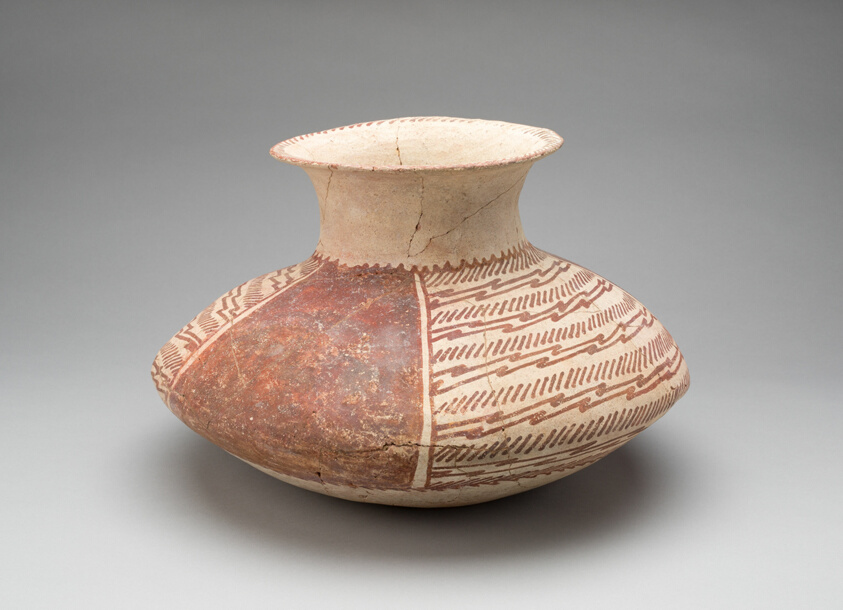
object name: Vessel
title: Jar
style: hohokam, Pre-Columbian, americas, southwest, native american, native north american, Arts of the Americas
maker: Hohokam (Southern Arizona, United States)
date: 950–1150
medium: Ceramic and pigment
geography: Arizona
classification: earthenware; ceramics; vessel; art of the americas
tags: geometric, hatching, zigzags, servingware